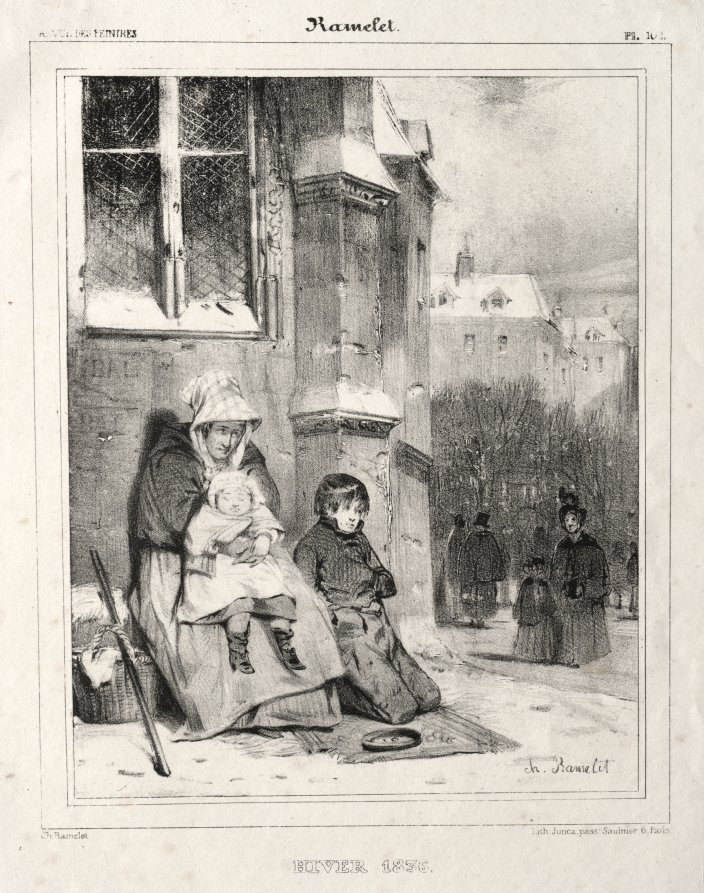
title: Winter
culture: France, 19th century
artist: Charles Ramelet (French, 1805–1851)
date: 1836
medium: lithograph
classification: Print